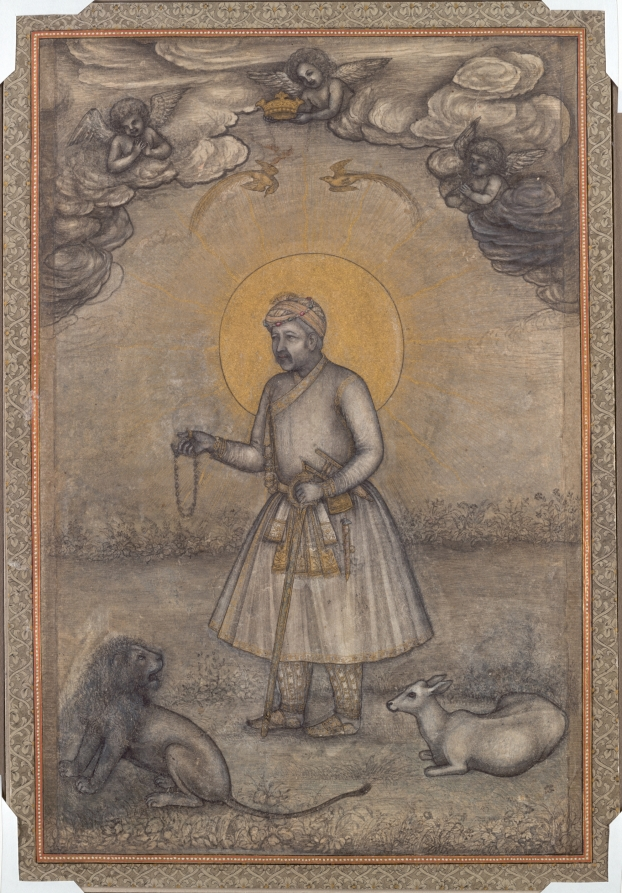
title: Portrait of the Aged Akbar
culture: India, Mughal court, 17th century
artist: attributed to Govardhan (Indian, active c.1596–1645)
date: c. 1640–50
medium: Gum tempera and gold on paper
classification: Painting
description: The soulful modeling of Akbar’s aged but dignified face argues strongly in favor of the attribution of this work to the imperial court artist Govardhan. This posthumous portrait of the celebrated third Mughal emperor would have been made at the end of his career for Akbar’s grandson Shah Jahan, who reigned from 1626 to 1648. Shah Jahan glorifies his own august lineage by lionizing Akbar and having him portrayed in a formal, symbolic way that Akbar himself never would have commissioned. Christian angels in European style praise him from the heavens, while mythical birds of paradise swoop at the edge of the radiance emitted from the nimbus of the divine light of his rule. He originally grasped an orb, which was changed to a necklace. The sensitively articulated body of a young cow reclines at ease in the presence of a lion, indicating the harmony and peace of his noble rule. The artist used the dignified nim-qalam style of painted drawing with only touches of gold and hints of color. Heavy outlines were added at a later date, along with pinprick holes used for copying the composition onto another sheet of paper.